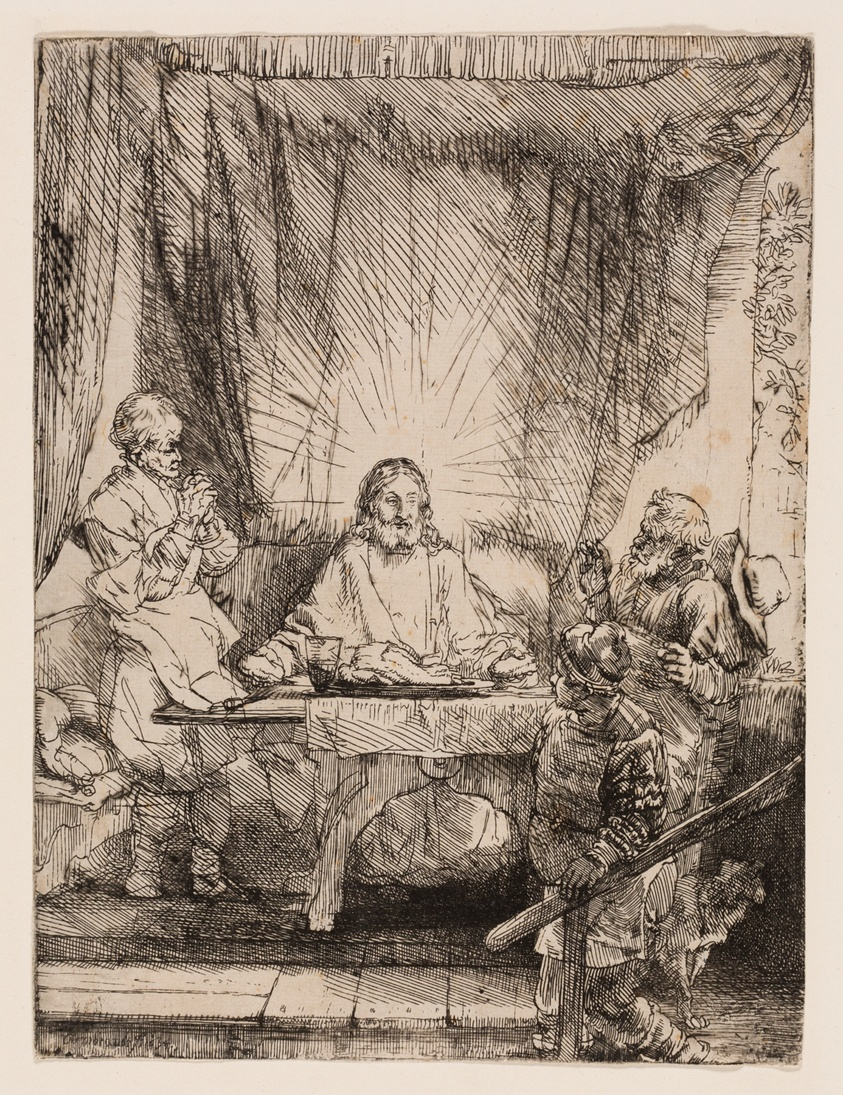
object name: Print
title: Christ at Emmaus: The Larger Plate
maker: Rembrandt van Rijn (Dutch, 1606-1669)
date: 1654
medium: Etching, burin, and drypoint on ivory laid paper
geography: Holland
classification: etching; print; prints and drawing; paper; drypoint; burin